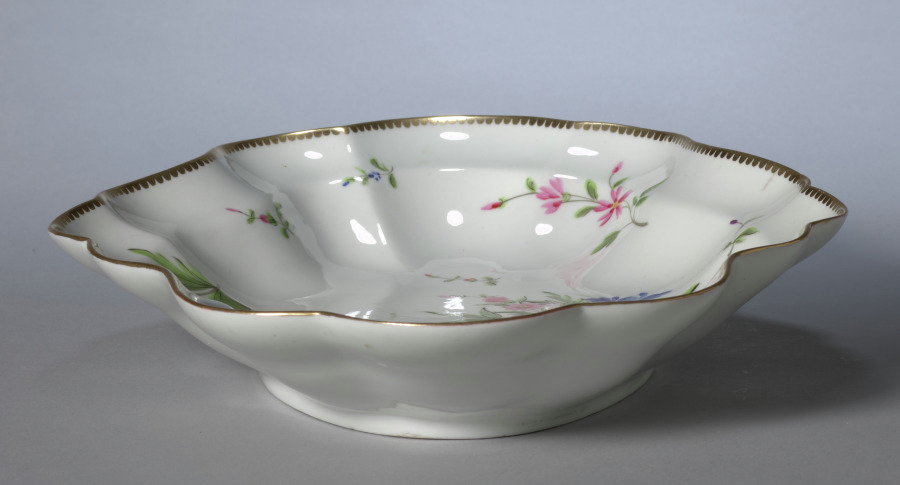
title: Dish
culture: England, 19th century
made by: Worcester Porcelain Factory (British, established 1751)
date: 1820–1840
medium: porcelain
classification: Ceramic